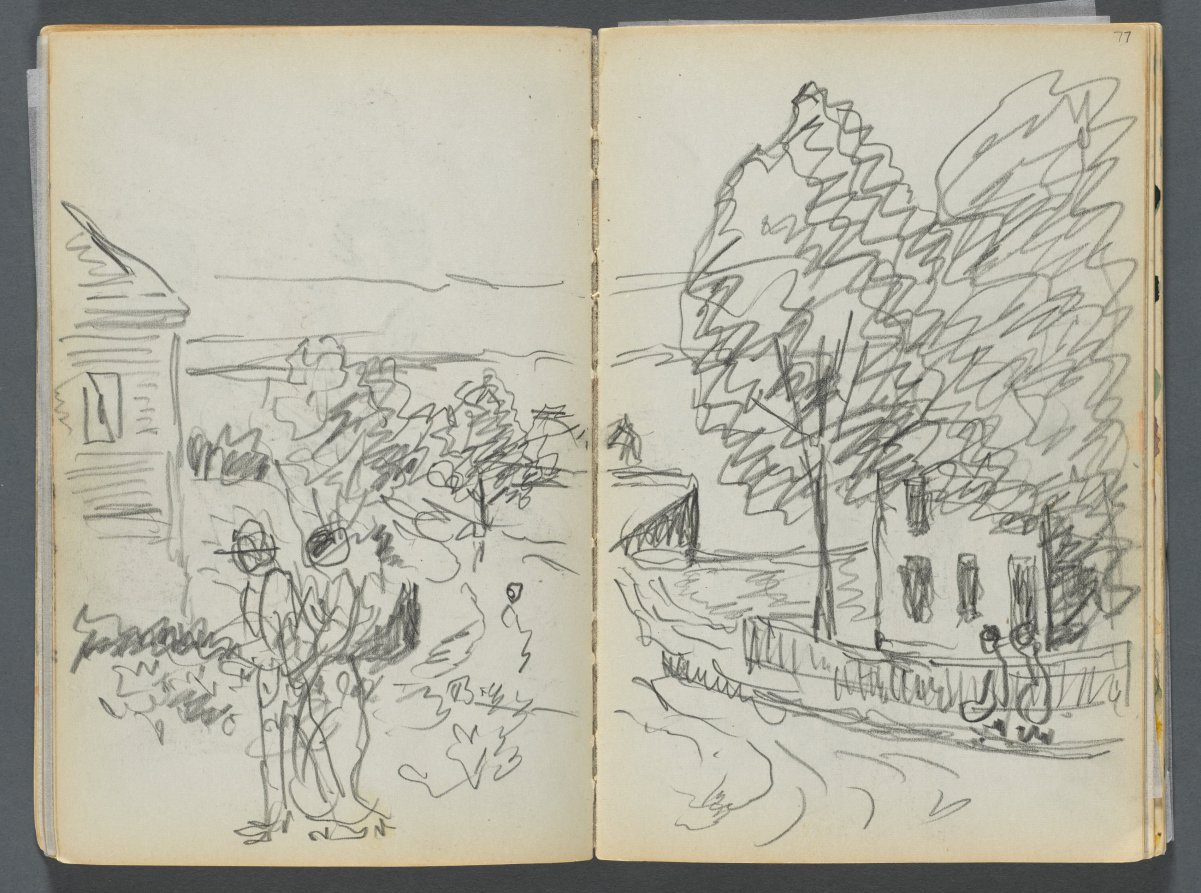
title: Sketchbook- The Granite Shore Hotel, Rockport, page 076 & 77: Village Scene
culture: America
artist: Maurice Prendergast (American, born Newfoundland [now Canada], 1858–1924)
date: 1905–10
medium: graphite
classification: Bound Volume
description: This sketchbook contains 72 pages of pencil drawings and 9 watercolors of Cape Ann. On the inside of the cover Prendergast wrote the address of the Granite Shore Hotel in Rockport, Massachusetts.